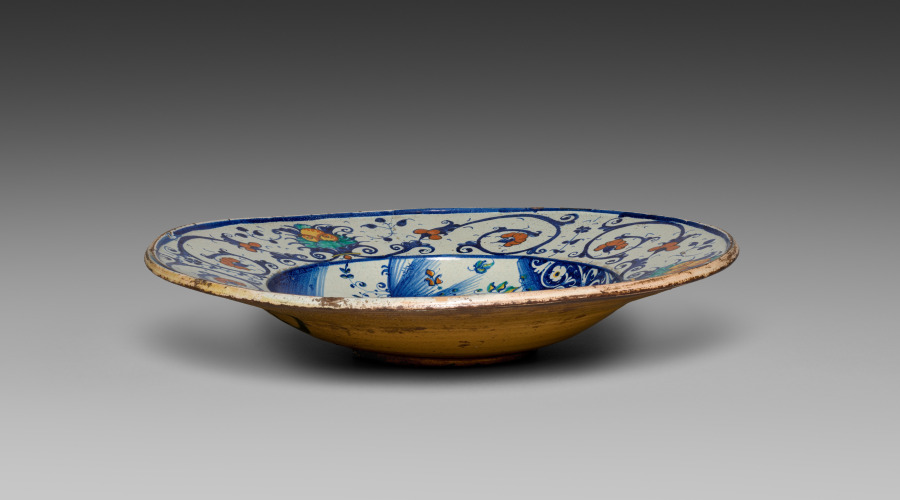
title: Bowl Depicting Saint Francis Receiving Stigmata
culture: Italy, Deruta, 16th century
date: 1531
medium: tin-glazed earthenware (maiolica)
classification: Ceramic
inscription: dated on reverse: "1531"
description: In this depiction representing his closeness to Christ, Saint Francis receives the stigmata through strikes of light from a vision of the risen Lord hovering as an angel in front of the basilica at Assisi. This bowl likely recalls a panel painting produced by the Italian master painter Giotto around 1300.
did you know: According to Christian tradition, the stigmata correspond to the appearance of Christ’s wounds at similar places on the faithful following his crucifixion.